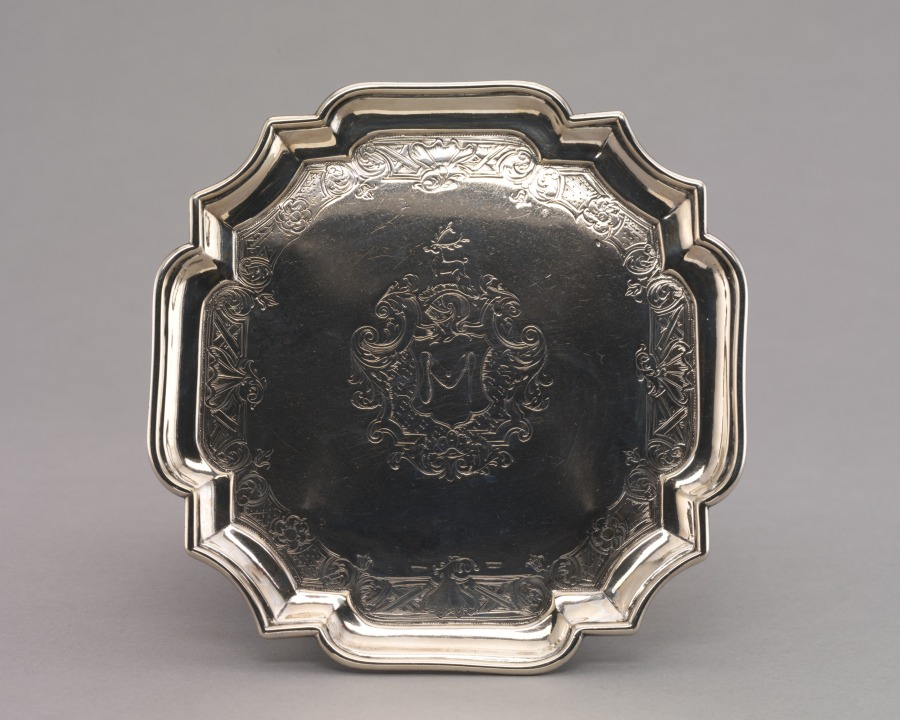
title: Pair of Salvers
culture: America, Massachusetts, Boston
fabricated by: Jacob Hurd (American, 1702–1758)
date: 1740–50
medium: silver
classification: Silver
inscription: engraved: H over A + T over 1750 in shaded block letters underneath each salver.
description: The coat of arms is that of the Hastings family, the original owners of these serving pieces.